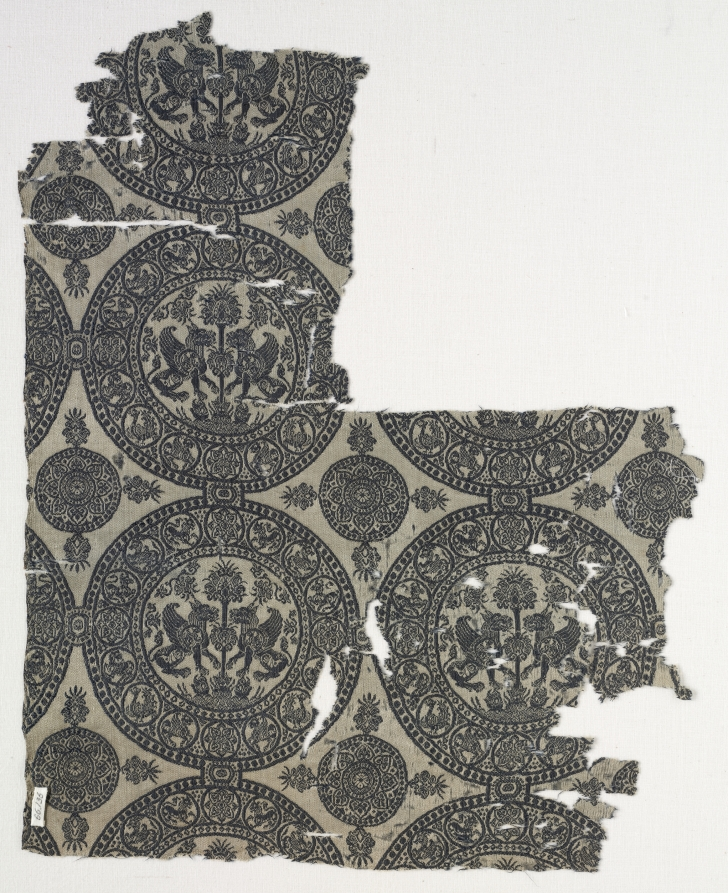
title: Fragments with Griffins in Roundels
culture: Iran or Iraq, in the style of the Seljuq period (1037–1194)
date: before 1966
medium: Silk: lampas weave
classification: Textile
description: This fragment consists of two almost complete roundels in lower right and fragment of third one at the left, plus parts of other roundels. In the roundels are a pair of confronted, winged griffins either side of a "palm" tree. Heavy baroque floral motifs fill the spaces between the main motifs and the roundel frame. The palm grows out of a curious foliate device at the bottom. The roundel frame has pearl borders between which are little circles about 2 cm. in diameter with a series of elegant tiny motifs beginning with a star at the four cardinal points and repeated, left and right, from top to bottom, are a lion, reclining winged ibex, reclining horned animal (possibly a bull), then center star on side, then winged griffin or goat(?), peacock, and lion regardant. In the interspaces are large circular motifs filled with stylized floral motifs and pendant floral motifs growing out in the four angles.